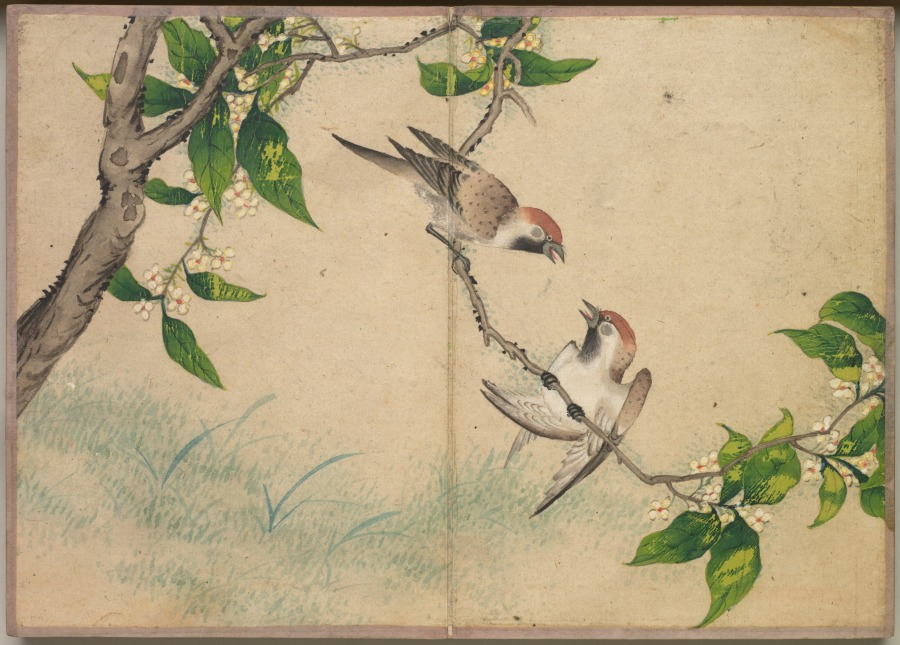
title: Desk Album: Flower and Bird Paintings (Gossiping Sparrows)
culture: China, Qing dynasty (1644-1911)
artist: Zhang Ruoai (Chinese, 1713–1746)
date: 1700s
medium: album leaf, ink and color on paper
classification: Painting